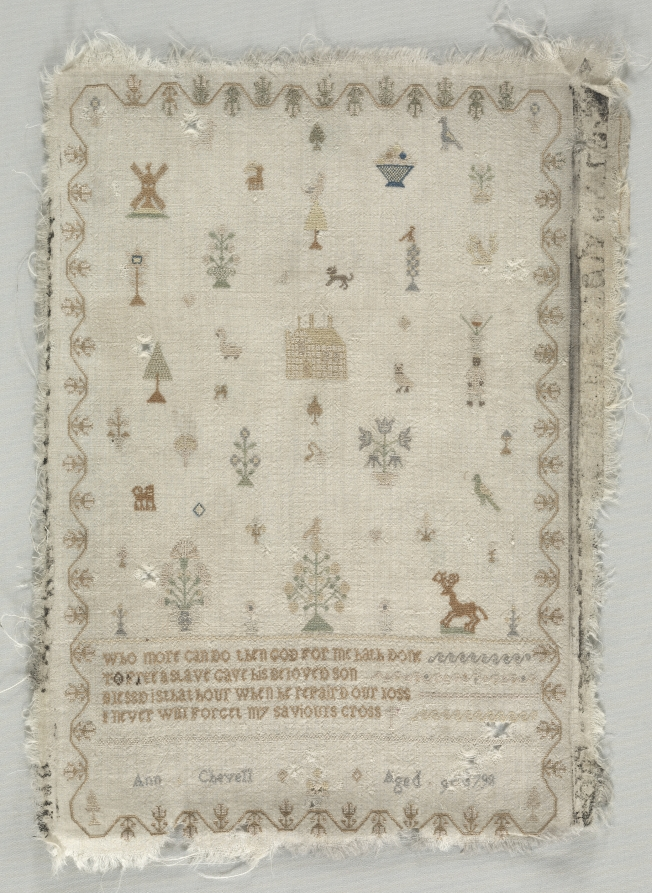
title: Sampler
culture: England, 18th century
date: 1798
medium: silk embroidery on wool, cross stitch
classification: Sampler